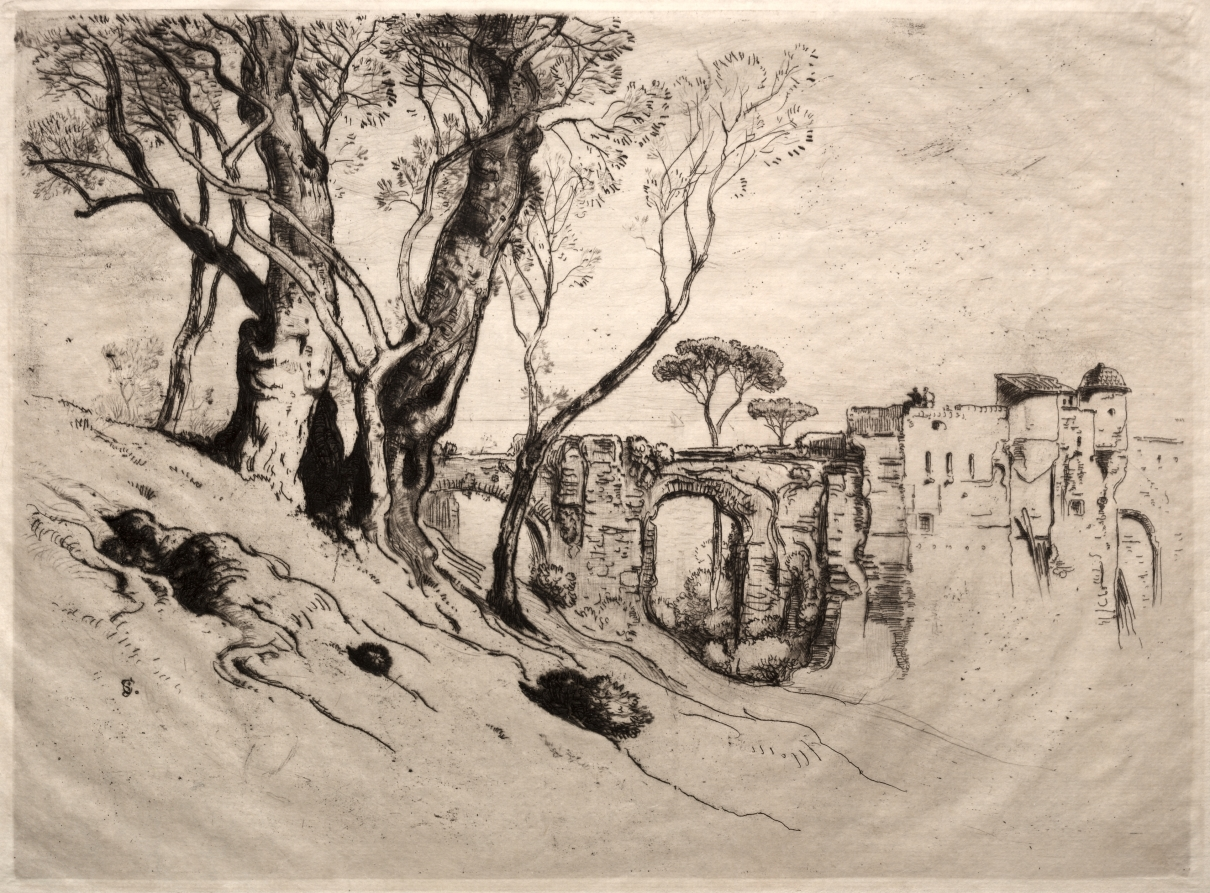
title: The Olive Trees of the Riviera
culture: America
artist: Samuel Colman (American, 1832–1920)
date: 1884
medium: etching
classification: Print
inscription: lower right, in graphite: Samuel Colman